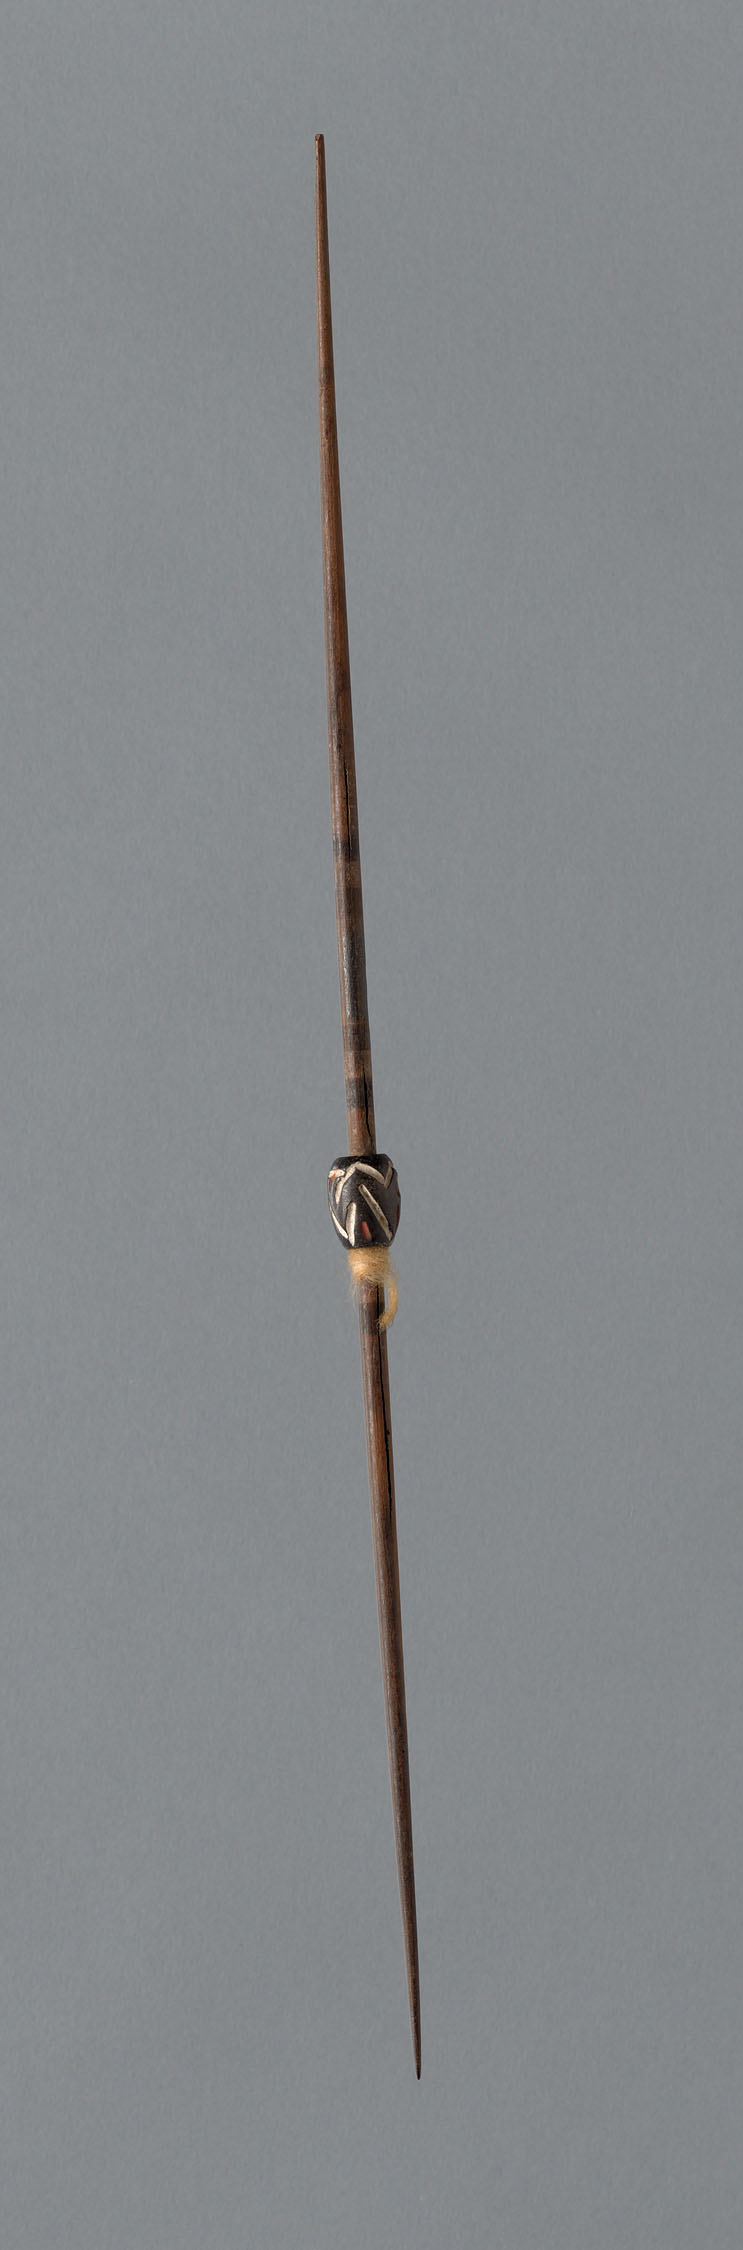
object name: non-art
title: Wooden Spindle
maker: Peru, Possibly central coast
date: 1000/1476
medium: Wood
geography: Peru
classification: spindles (textile working equipment); textile working equipment; accessories (object genre); textile